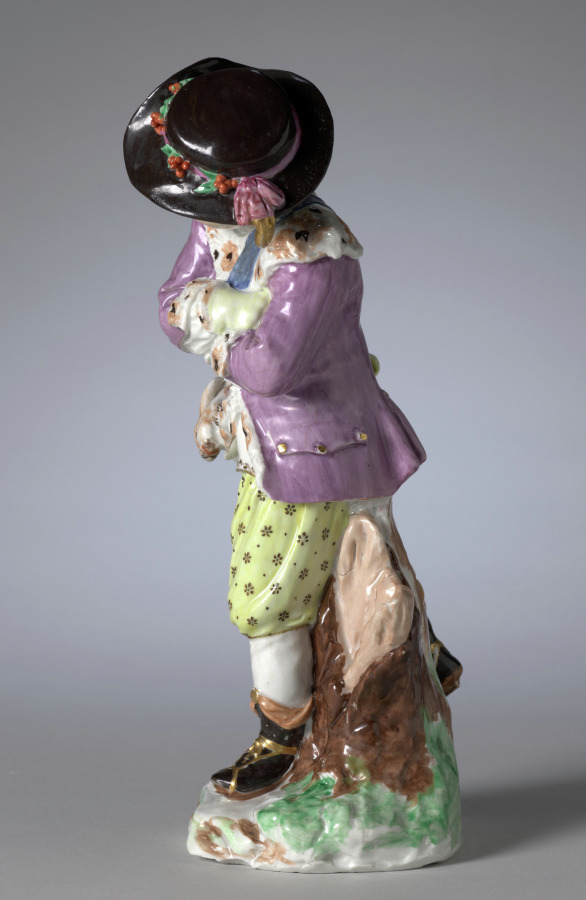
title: Figure of Winter from the Four Seasons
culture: England, Bristol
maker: Bristol Porcelain Factory (British, 1770–81)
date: c. 1775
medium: hard-paste porcelain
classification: Ceramic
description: The modern notion of childhood as a time of innocence and simplicity emerged during the second half of the eighteenth century. This understanding of adolescence led to numerous depictions of children as personifications of the four seasons. Here winter is portrayed as a young boy wearing ice skates, a fur-lined jacket, and a hat adorned with holly branches. In his satchel he carries a goose and rabbit, both of which are commonly hunted in the winter.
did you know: Allegorical figures most often decorated a table during the dessert course, providing amusing subjects for conversation.